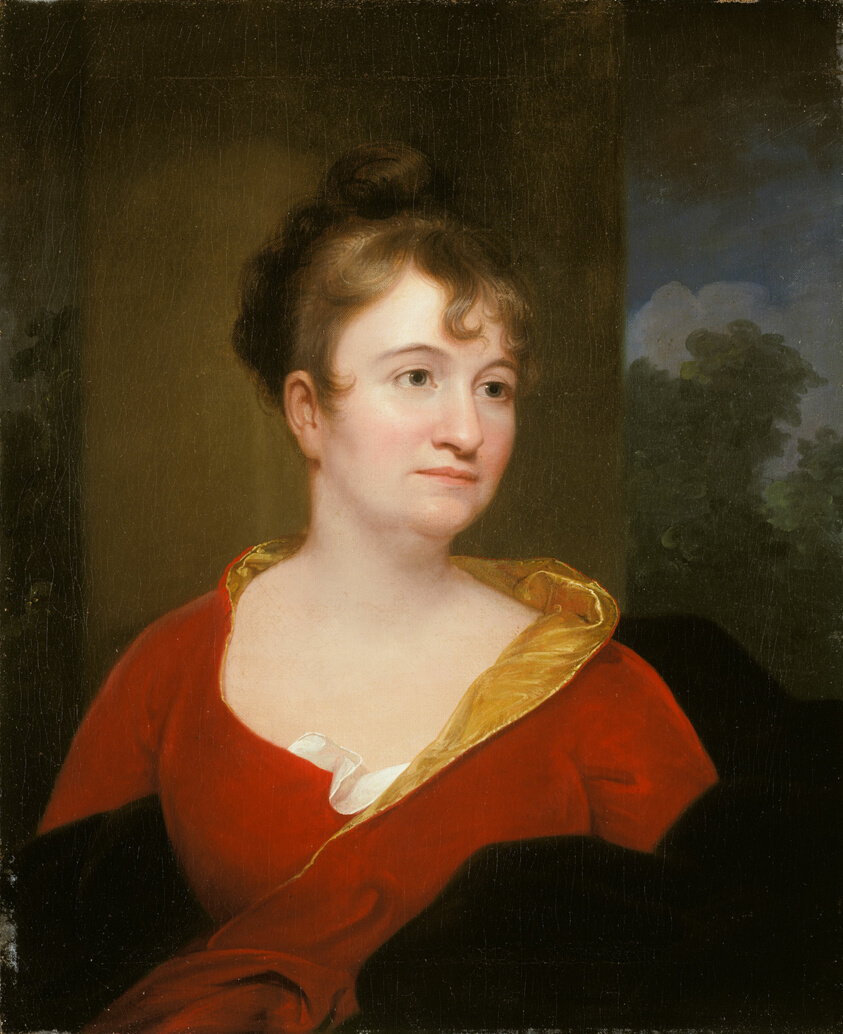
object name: Painting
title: Abigail Inskeep Bradford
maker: Rembrandt Peale (American, 1778–1860)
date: 1803–8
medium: Oil on canvas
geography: United States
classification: painting; american arts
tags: fashion, women, portraits, people